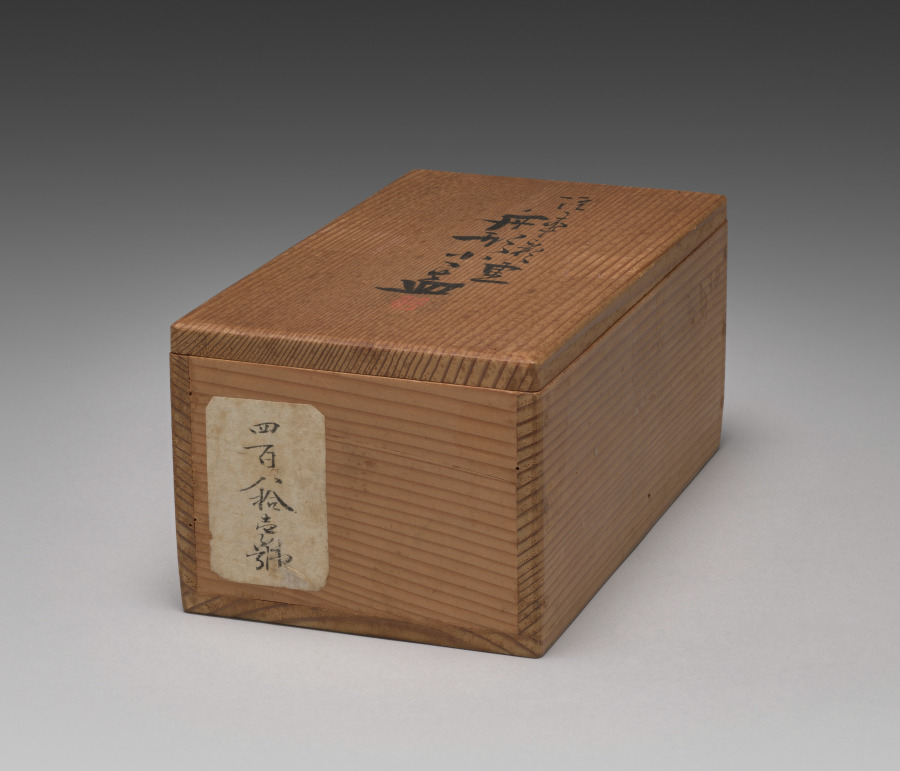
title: Boat-Shaped Bowl with Plovers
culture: Japan, Meiji period (1868–1912)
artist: Seifū Yohei III (Japanese, 1851–1914)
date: 1893–97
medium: Stoneware with crackled glaze and overglaze color enamel and gold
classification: Ceramic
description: Overglaze color enamels create a seascape made complete by the bowl’s boat shape. The bowl’s form inserts a human presence into the scene, much in the way rusu mōyō is used in paintings to suggest people just out of view. Rusu mōyō is a pictorial device by which the presence of someone physically absent from an image is conveyed through the depiction of clothing or other items. The inside of the bowl has a scene of plovers flying through the sky over a profusion of seaweed in sand below. In addition to the black, gray, and green of the overglaze elements, warm pink banding and mottling in the clay come through the glaze and are remarkably effective at suggesting the seashore.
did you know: On the outside of the bowl, on each side, birds fly about grasses in search of a meal.